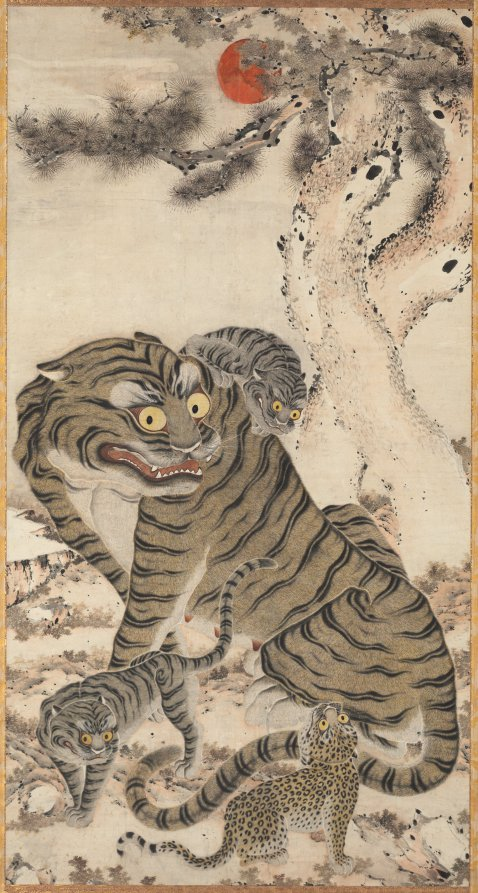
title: Tiger Family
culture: Korea, Joseon dynasty (1392–1910)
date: late 1800s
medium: hanging scroll; ink and color on paper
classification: Painting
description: In deep mountains, a tigress, two cubs, and a leopard welcome the early morning sun. This is not merely a playful scene but a well calculated image with symbols of longevity (pine trees), prosperity (tigress and cubs), and good fortune (leopard). Traditionally, on New Year’s Eve, the image of a fearsome-looking tiger was pasted on entrance doors to ward off evil spirits. Conventional Korean tiger paintings often include frolicking magpies, but here, the crimson sun is placed behind a majestic pine. Through the sunrise and the details of the felines’ skin shines the artist’s keen interest in creating a realistic atmosphere.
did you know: A great number of tigers used to have live in the Korean peninsula. An old Chinese proverb says: “Korean people hunt tigers half of the year, and tigers hunt people other half of the year.”